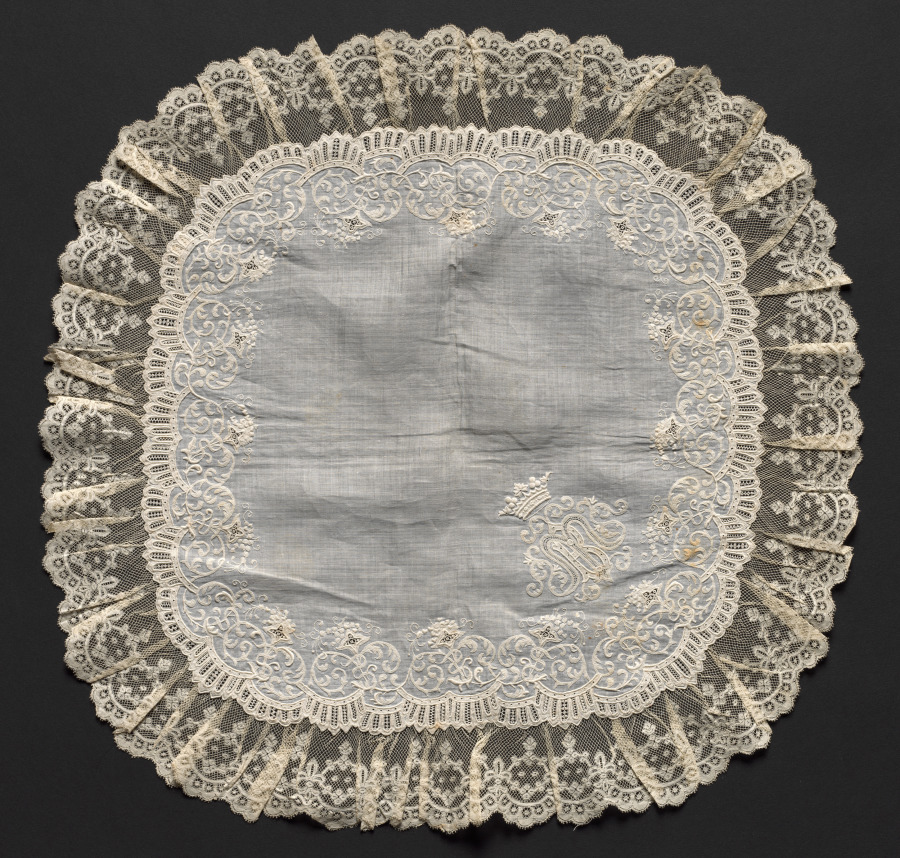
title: Lace Handkerchief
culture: Switzerland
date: 1700s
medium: linen: embroidery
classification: Embroidery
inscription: monogram "B.M." with coronet.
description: This lace handkerchief has an embroidered monogram in one corner with the initials B. M. topped by a coronet.